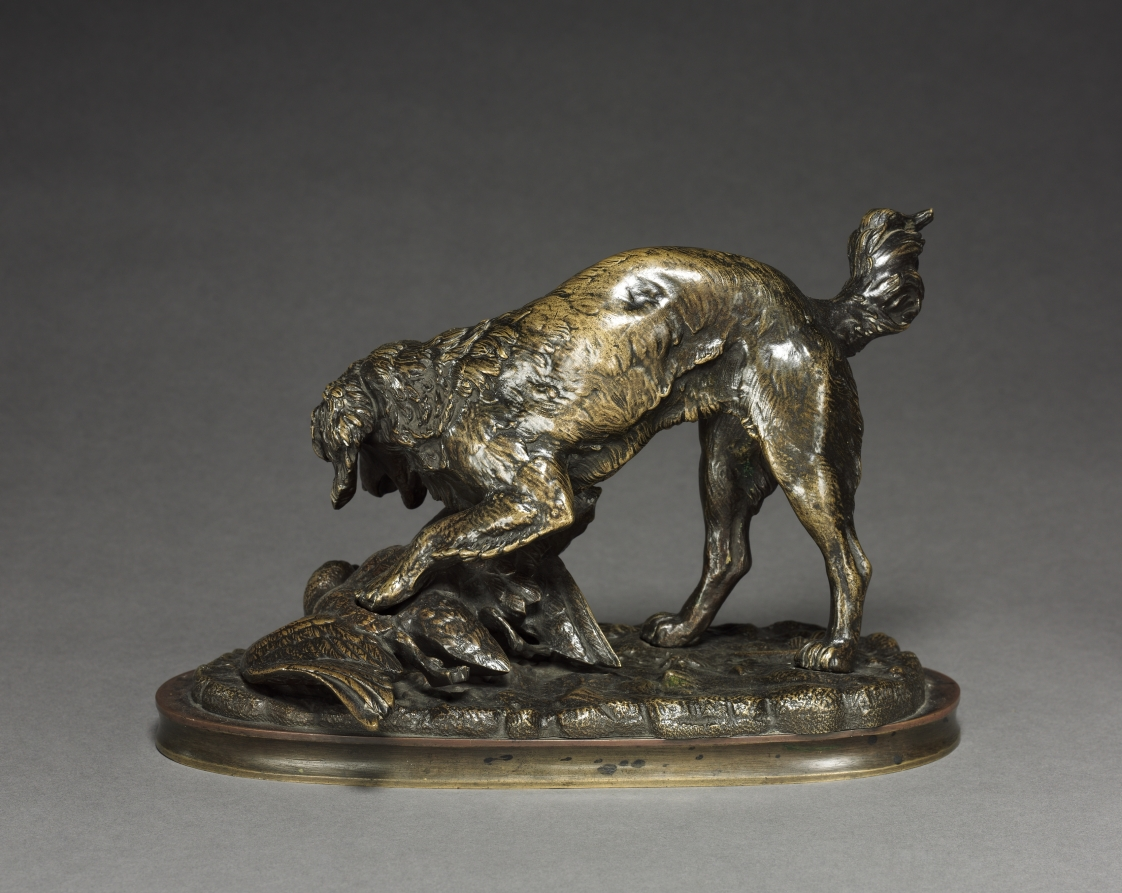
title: Spaniel and Duck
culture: France, 19th century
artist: Antoine-Louis Barye (French, 1796–1875)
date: c.1830 – 1875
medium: bronze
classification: Sculpture